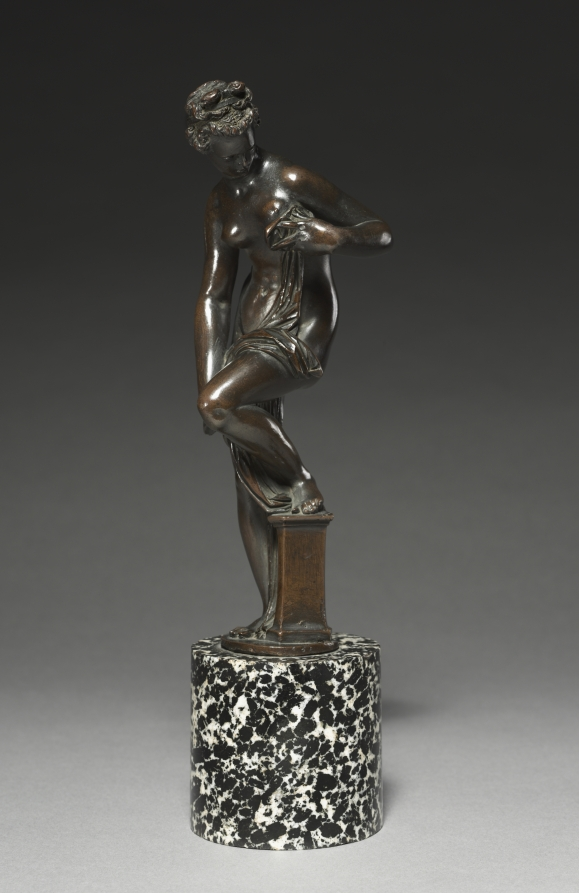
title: Venus after the Bath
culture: Italy, early 17th century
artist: cast possibly by the Workshop of Giambologna (Flemish, active Italy, 1529–1608)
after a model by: Giambologna (Flemish, active Italy, 1529–1608)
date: c. 1600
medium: bronze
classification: Sculpture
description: The statuette’s scale speaks to its likely place in private, intimate settings. The serpentine composition would have encouraged close examination from multiple angles. Compare the complexity of her pose to the relatively static Venus with a Burning Urn (1948.171).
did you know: Giambologna intended his bronze statuettes to be held and touched, to fully appreciate their smooth, elegant forms.